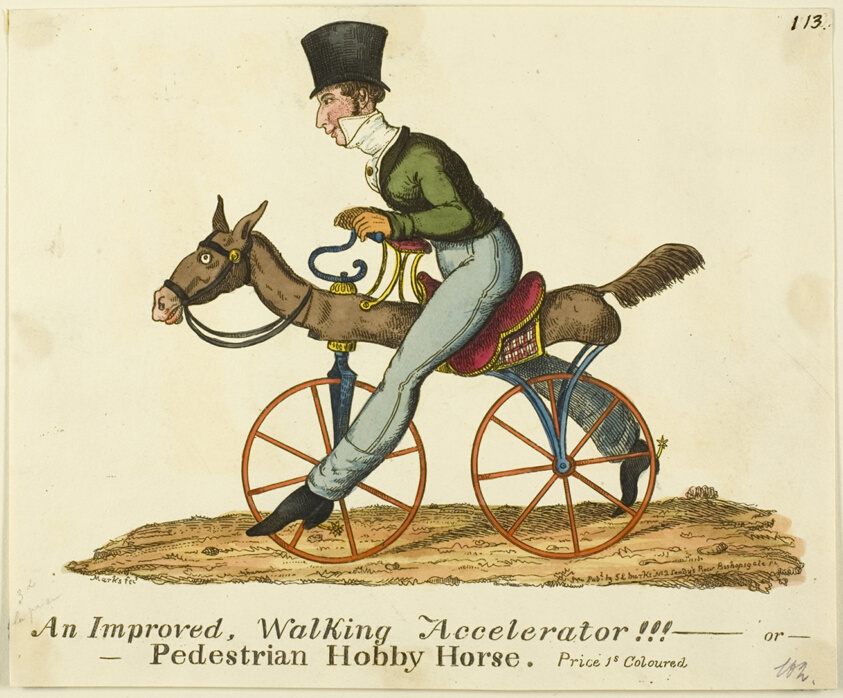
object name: Print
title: Pedestrian Hobby Horse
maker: J. Lewis Marks (English, 1769-c. 1832)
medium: Hand-colored etching on cream wove paper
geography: England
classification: etching; print; prints and drawing